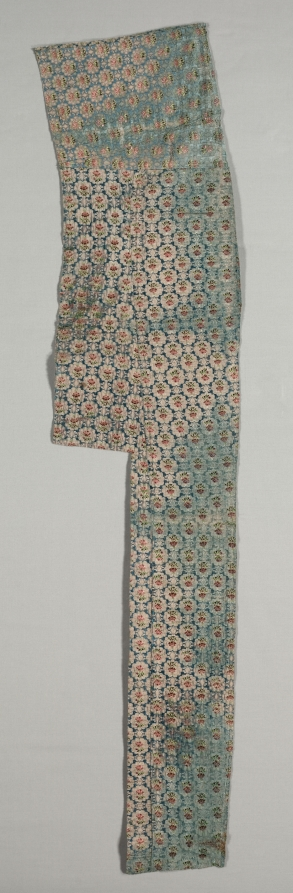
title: Fragment with Floral Design on a Silver Ground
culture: France, 18th century, Period of Louis XVI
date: 1700s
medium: Droguets Lisèrés; silk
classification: Textile